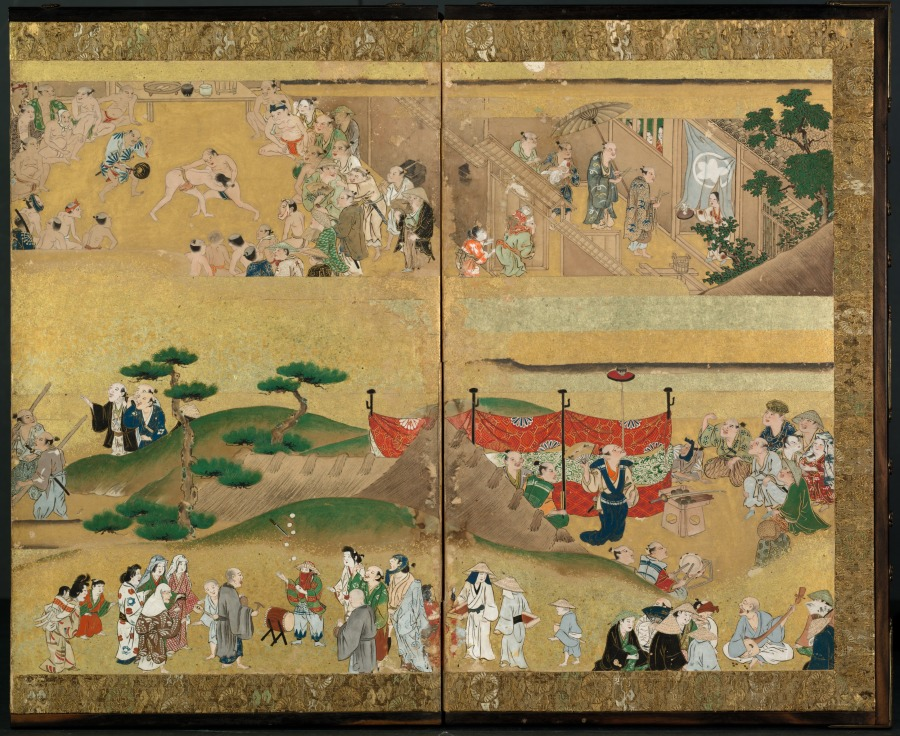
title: Festival Scenes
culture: Japan, Edo period (1615–1868)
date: 1600s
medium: one of a pair of six-panel folding screens; ink, color, gold, and gold leaf on paper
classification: Painting